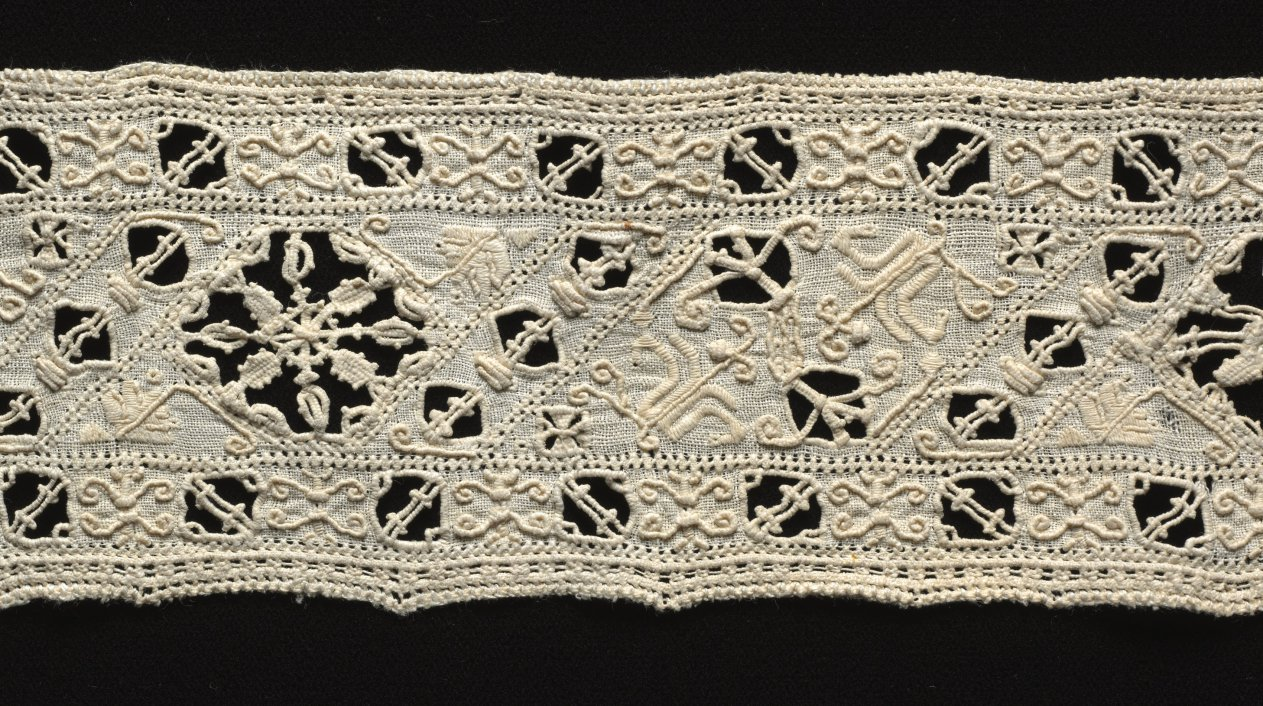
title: Lace Band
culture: Italy, 1560-1699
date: 1560–1699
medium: Linen: needle lace (cutwork) insertion and embroidery (curl stitch and satin stitch)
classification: Lace